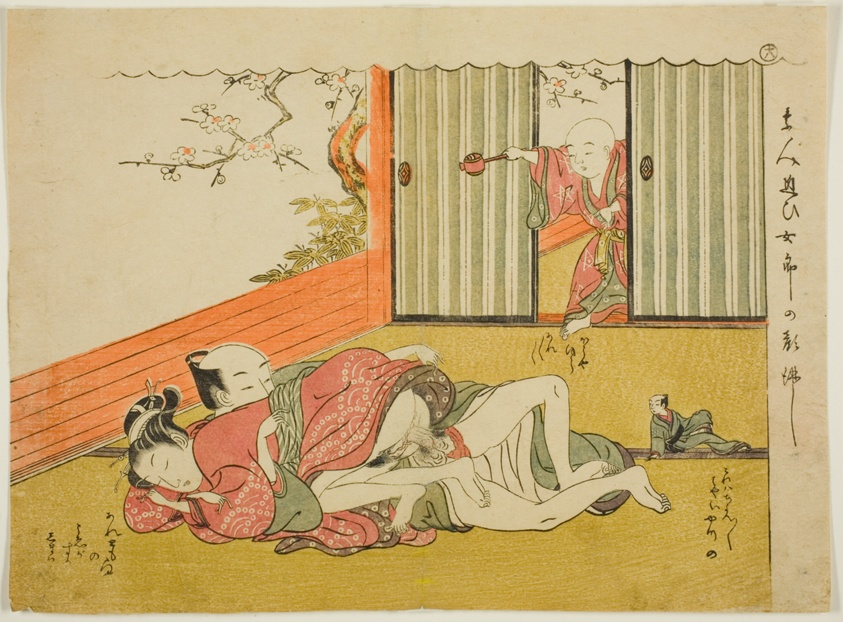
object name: Print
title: Lovers Interrupted, sheet 18 from the series "Poems of the Husband and Wife Mane'emon (Haikai meoto Mane'emon)"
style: Japanese (culture or style)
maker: Isoda Koryusai (Japanese, 1735-1790)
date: c. 1770/71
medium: Color woodblock print; chuban yoko-e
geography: Japan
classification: woodblock print; print; asian art